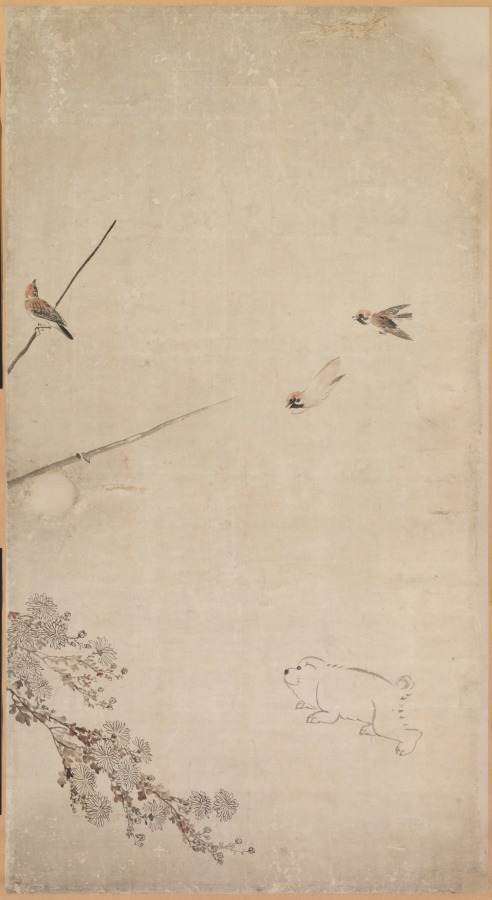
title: Puppies, Sparrows, and Chrysanthemums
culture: Japan, Edo period (1615–1868)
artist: Nagasawa Rosetsu (Japanese, 1754–1799)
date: c. 1792–94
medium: Fusuma panel remounted as a hanging scroll; ink and slight color on paper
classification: Painting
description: These paintings were originally mounted as sliding doors (fusuma) used inside a building. The circular areas on the paintings’ paper surfaces are traces of the former positions of the door pulls (hikite). A flock of sparrows gathers on a trellis supporting flowering chrysanthemum. Below is a litter of puppies, some cavorting, others napping. The tender story created by the curious puppy peering up and tilting its head to listen to the bird’s insistent call (in the leftmost part of the composition) is characteristic of Nagasawa Rosetsu’s paintings, which often use animals to illustrate the human condition.